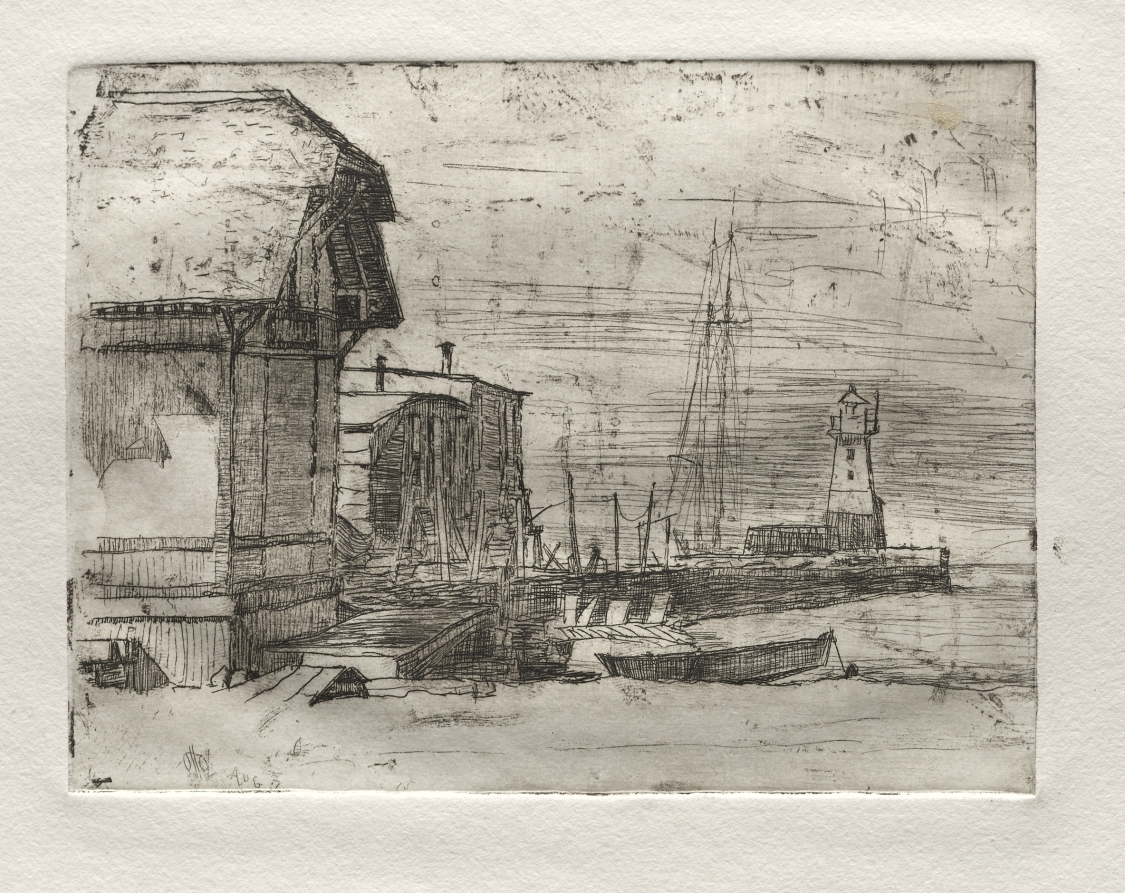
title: West Pier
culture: America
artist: Otto H. Bacher (American, 1856–1909)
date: 1878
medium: etching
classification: Print